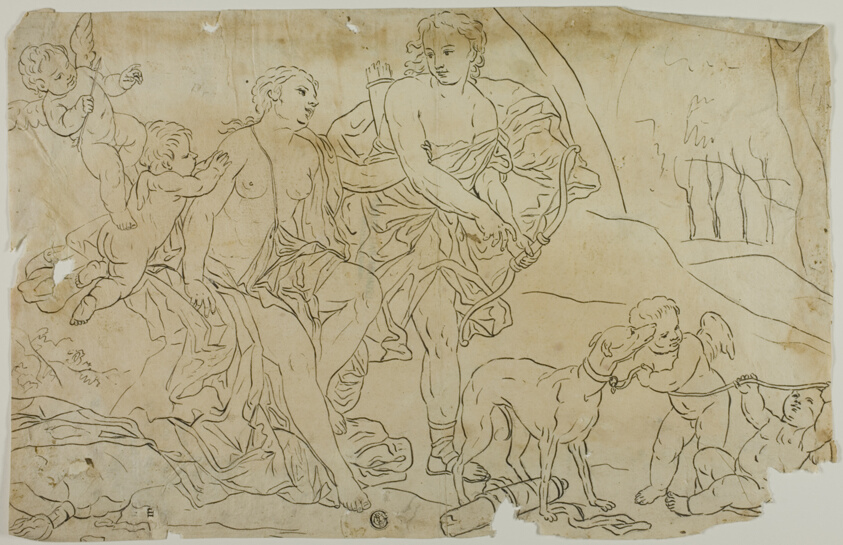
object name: Drawing and Watercolor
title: Diana and Endymion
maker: Unknown Artist; European, 1700-1799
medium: Pen and black ink, on cream laid paper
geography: Europe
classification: pen and ink drawings; drawings (visual works); prints and drawing